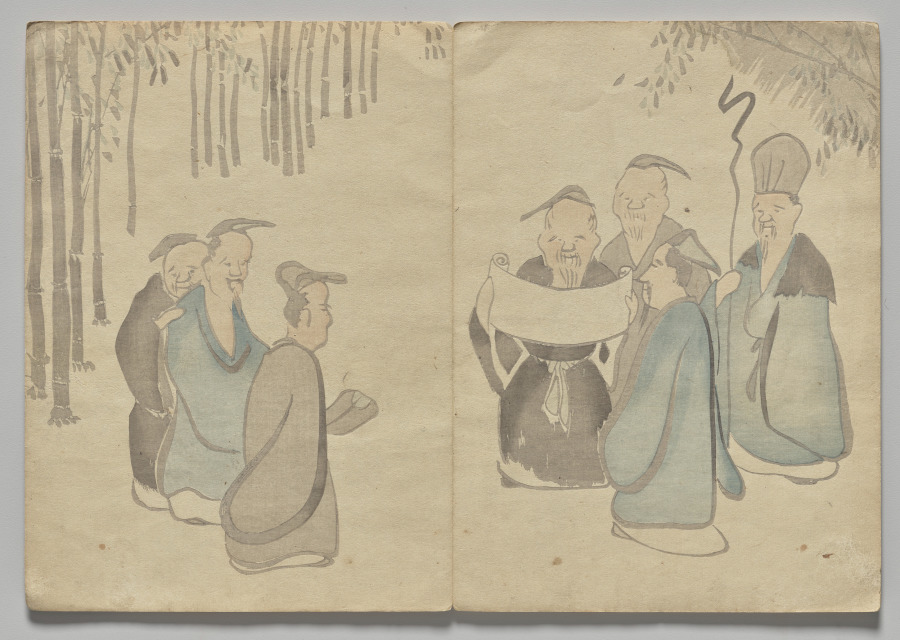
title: Scene from The Kōrin Picture Book (Volume 2)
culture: Japan, Edo period (1615–1868)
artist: Nakamura Hōchū (Japanese, d. 1819)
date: 1800s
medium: color woodblock printed book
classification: Bound Volume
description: Ogata Korin (1658-1716) was one of the most admired artists of Rimpa, or "decorative school painting." These books by the charming later-generation Rimpa artist Hochu record Korin's inventive designs.